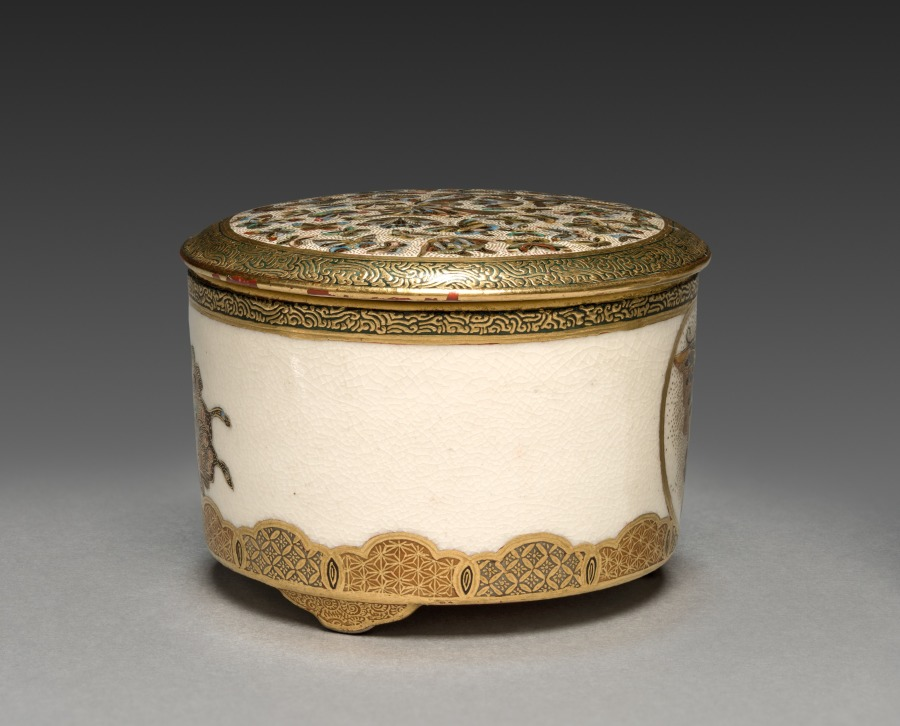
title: Jar with Butterflies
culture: Japan, Meiji period (1868–1912)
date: late 1800s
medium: porcelain (Satsuma ware)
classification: Ceramic